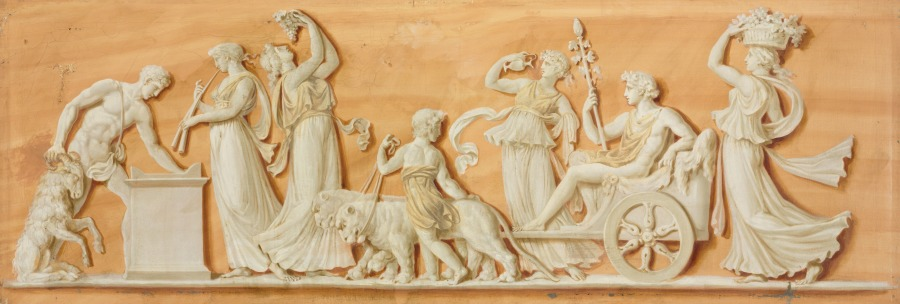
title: Overdoor Painting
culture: France, 18th century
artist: Pierre Rousseau (French, 1751–1829)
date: 1790s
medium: oil on canvas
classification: Painting